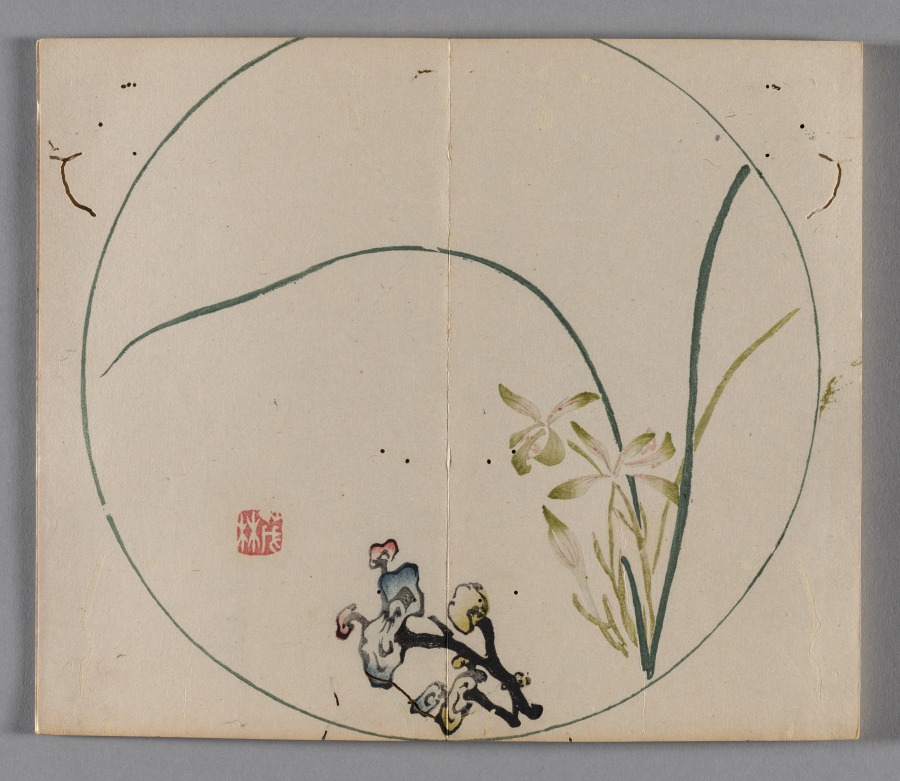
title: Ten Bamboo Studio Painting and Calligraphy Handbook (Shizhuzhai shuhua pu): Round Fans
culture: China, Qing dynasty (1644-1911)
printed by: Hu Zhengyan (Chinese, c. 1584–1674)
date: 1633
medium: Woodblock-printed book; ink and colors on paper; first edition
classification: Print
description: Color printing reached a level of perfection in the early 1600s, as seen in this Ten Bamboo Studio Collection of Calligraphy and Painting and the Mustard Seed Garden Manual of Painting (printed 1679 and 1701). The painterly quality, precision in registering (aligning) the woodblocks, and harmonious colors made them the most successful color print editions in Chinese history. Both editions were printed and compiled in Nanjing, spread nationwide, and had a great impact on the arts in Japan and Korea.